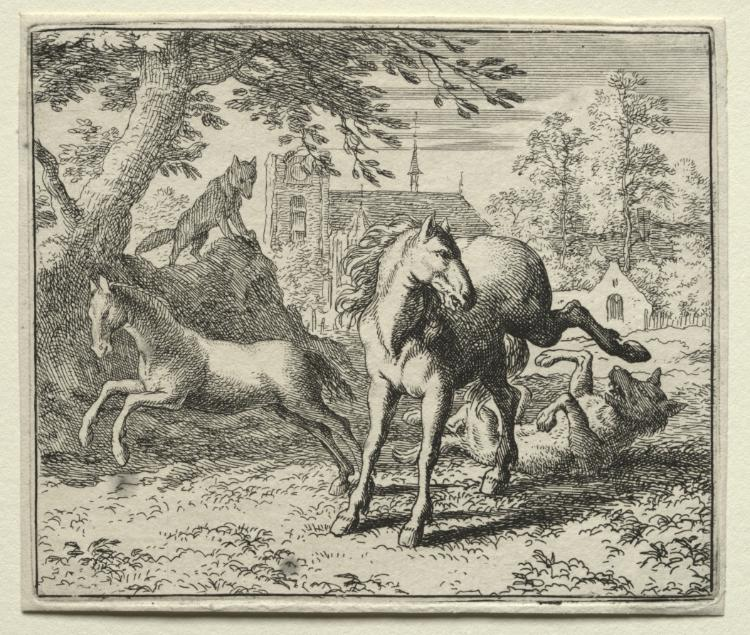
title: Reynard the Fox: Reynard Tricks the Wolf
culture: Netherlands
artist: Allart van Everdingen (Dutch, 1621–1675)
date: 1650–75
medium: etching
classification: Print